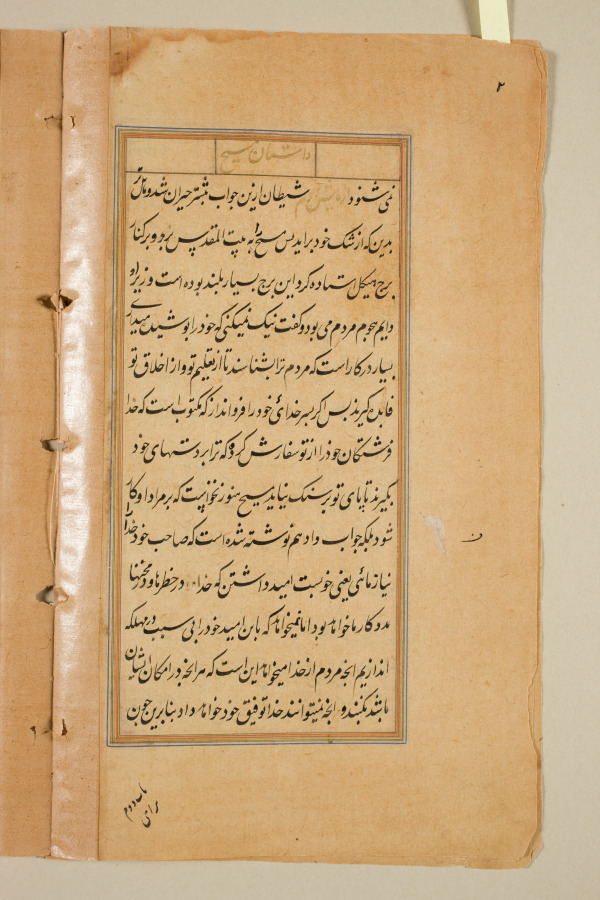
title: Text page from a Mirror of Holiness (Mir’at al-quds) of Father Jerome Xavier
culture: Mughal India, Allahabad, made for Prince Salim (1569–1627)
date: 1602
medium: Ink and gold on paper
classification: Manuscript